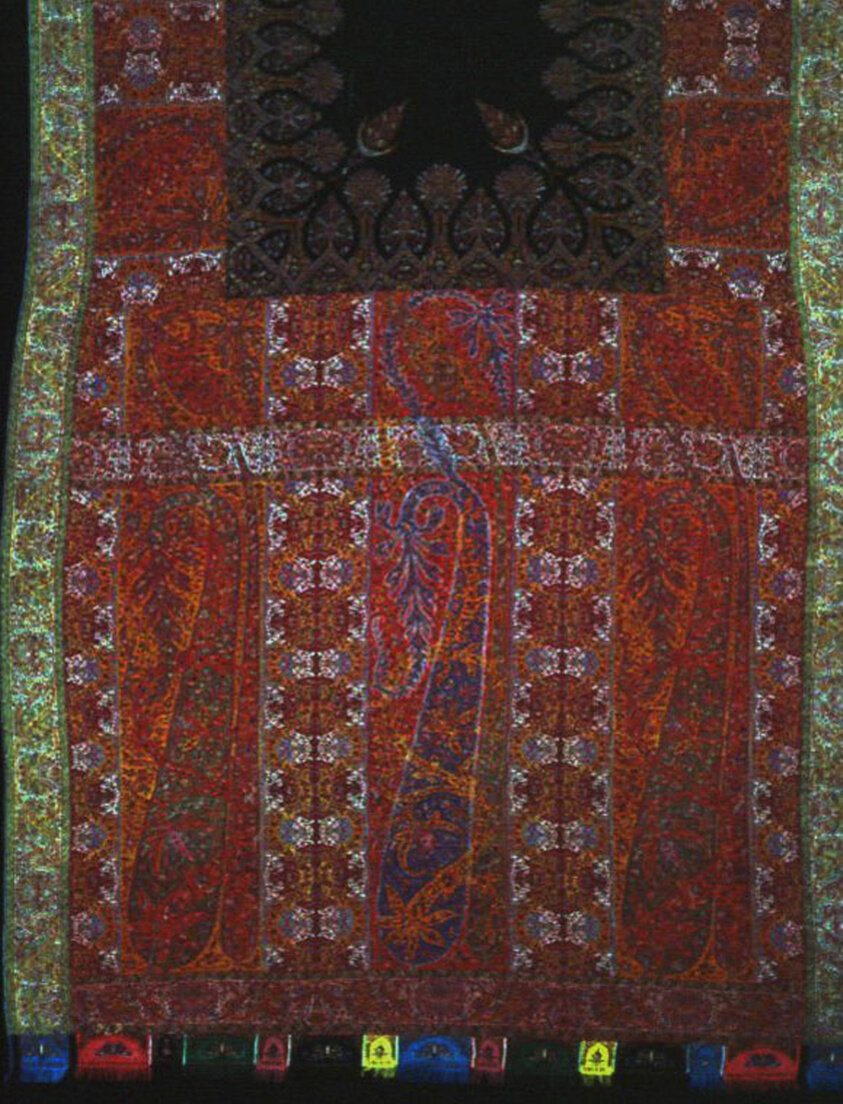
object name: Textile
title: Long Shawl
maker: India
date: 1825/1875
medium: Wool, double interlocking twill tapestry weave, woven in rectangular sections; "Harlequin" tabs of twill weaves; embroidered with wool in back, flat, fly, satin, and stem stitches; laid work and couching; embroidered with silk in long and short stitches; warp fringe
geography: India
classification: textile; weaving